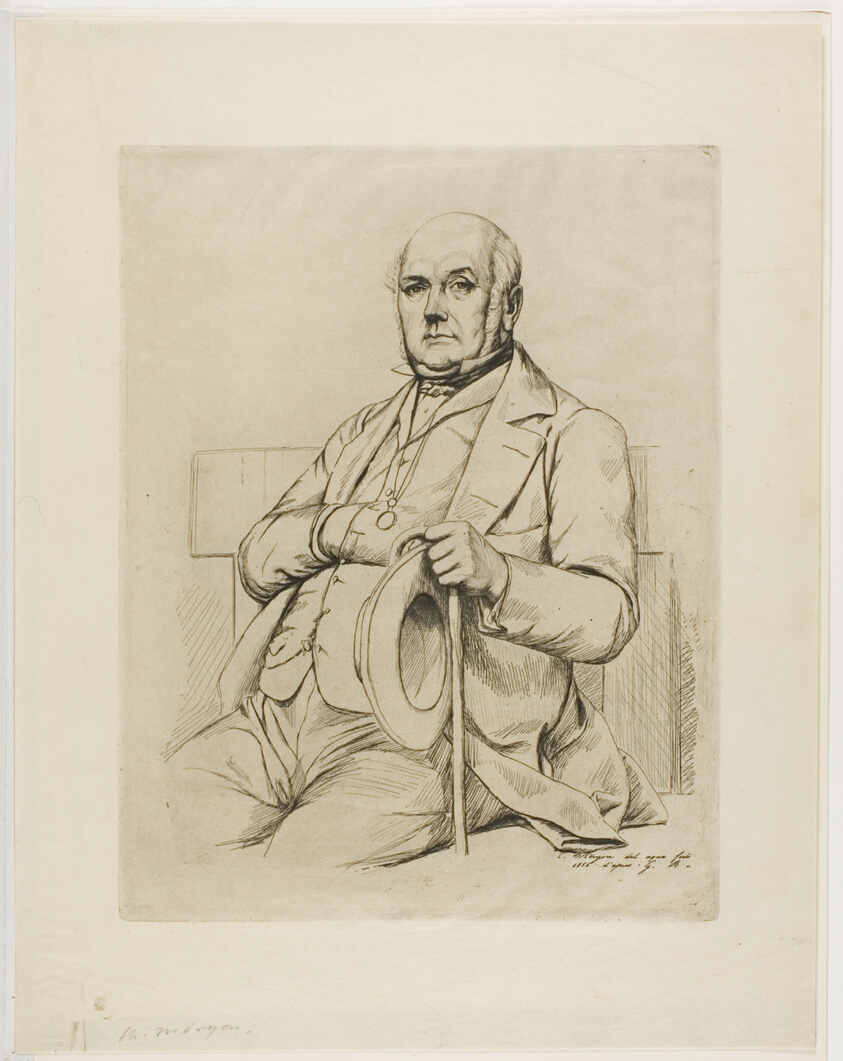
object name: Print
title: Portrait of Casimir le Conte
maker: Charles Meryon (French, 1821-1868); after Gustave Clarence Rodolphe Boulanger (French, 1824-1888)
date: 1856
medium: Etching on ivory laid paper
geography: France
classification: etching; print; prints and drawing